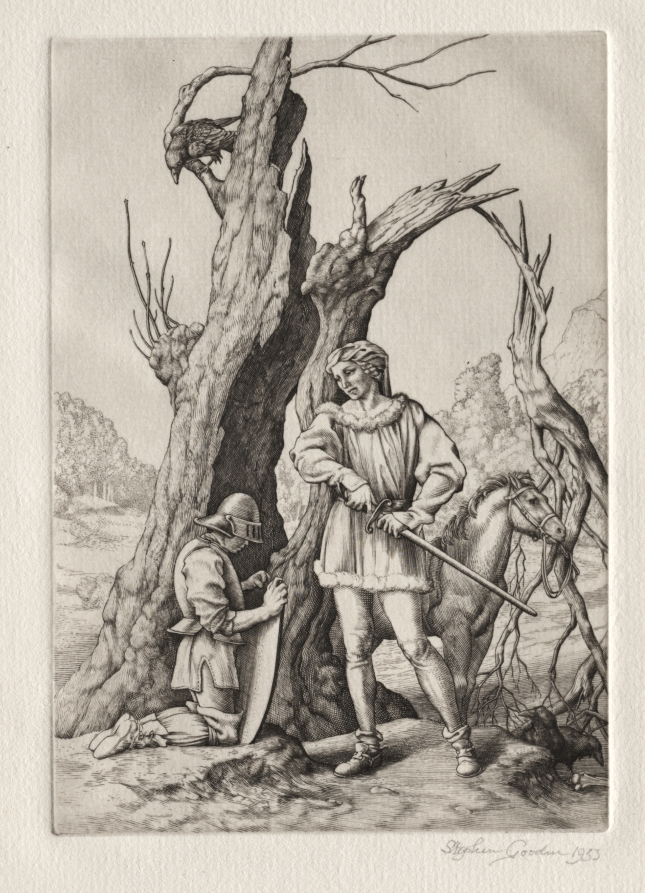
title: Illustration for "Peronnik the Fool": Peronnik and Sir Gilles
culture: England, 20th century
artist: Stephen Gooden (British, 1892–1955)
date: 1933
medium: engraving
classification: Print